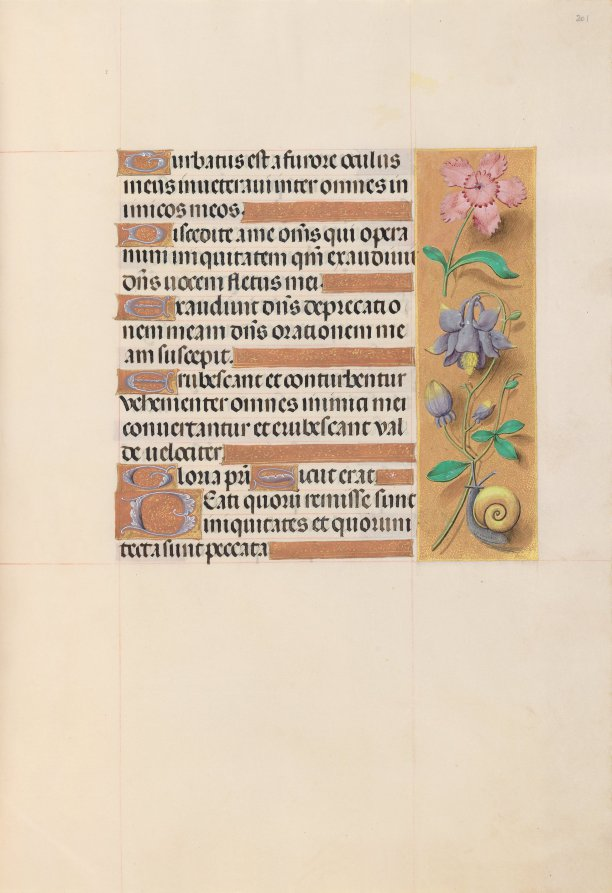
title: Hours of Queen Isabella the Catholic, Queen of Spain: Fol. 201r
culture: Flanders, Ghent and Bruges, late 15th century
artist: Master of the First Prayerbook of Maximillian (Flemish, c. 1444–1519)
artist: and Associates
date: c. 1500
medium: ink, tempera, and gold on vellum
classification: Bound Volume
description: This manuscript was illuminated by a circle of at least five highly organized manuscript painters active in the Flemish cities of Ghent and Bruges. The principal illuminator was Alexander Bening, who painted the majority of the book's miniatures. Manuscripts produced by this circle of artists are renowned for the decoration of their borders, which typically feature a rich variety of realistically-painted flowers, birds, and butterflies. This prayer book, called a book of hours, was intended not for a cleric, but for the private devotions of a lay person-in this case, Isabella the Catholic, Queen of Spain (1451-1504). Isabella's coat of arms embellishes the book's frontispiece. It is unlikely that the book was commissioned by the Queen herself; rather, she probably received it as a diplomatic gift from someone courting her patronage, perhaps Cardinal Francisco Jimenez de Cisneros. A Franciscan friar, Jimenez was dependent upon Isabella for his advancement, first to the post of Queen's confessor in 1492, and then to Archbishop of Toledo in 1495.